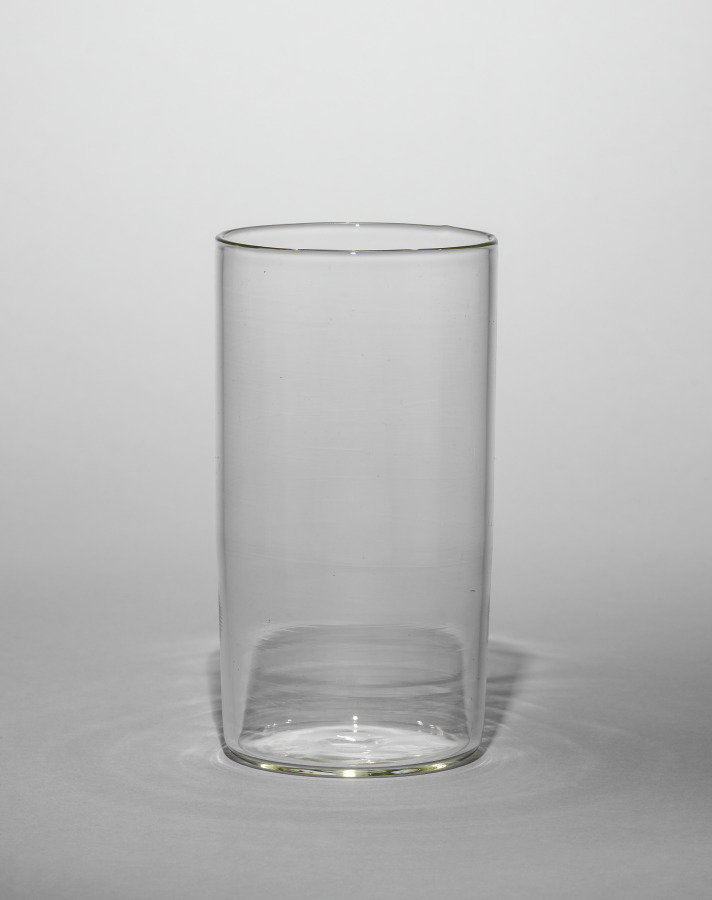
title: Tea Cup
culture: Russian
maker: House of Fabergé (Russian, 1842–1918)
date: c. 1908–1917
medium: glass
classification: Glass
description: Likely from a larger set, this tea glass with its holder is an excellent example of Fabergé’s ability to imbue objects of everyday use with exceptional artistry.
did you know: In Russia, tea has been served in glasses since the eighteenth century.